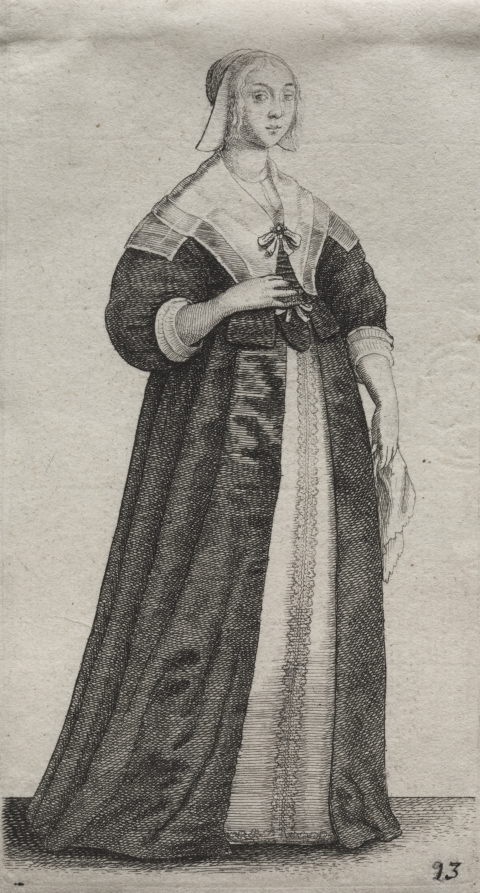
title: The Several Habits of English Women, from the Nobility to the Country Women as they are in these times: The Woman with a Handkerchief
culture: Bohemia, 17th century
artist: Wenceslaus Hollar (Bohemian, 1607–1677)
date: 1639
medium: etching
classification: Print